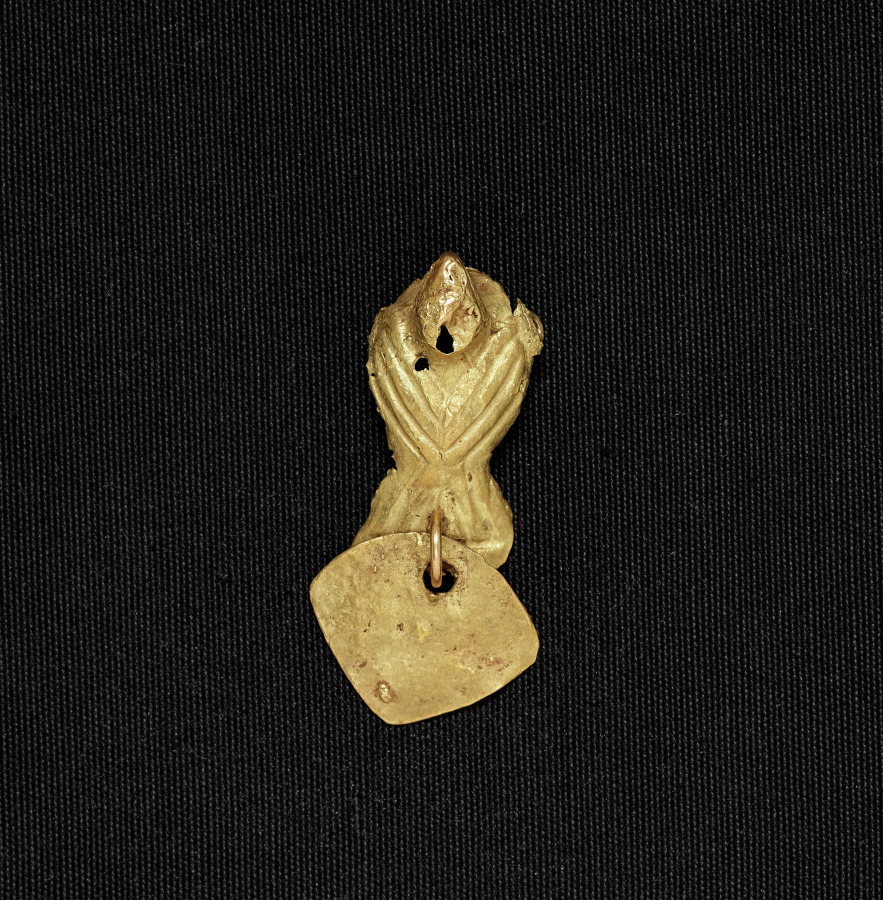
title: Bird Bead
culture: Colombia, Muisca style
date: c. 900–1550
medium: cast gold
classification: Jewelry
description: Muisca metalwork divides into two categories: ornaments to be worn, such as these, and offering figurines, in the case to the right. The elaborate bird pendant features delicate herringbone moldings, openwork patterns, and wing details-all part of the wax model from which the pendant was cast (see nearby computer animation). The dangles were attached after casting.